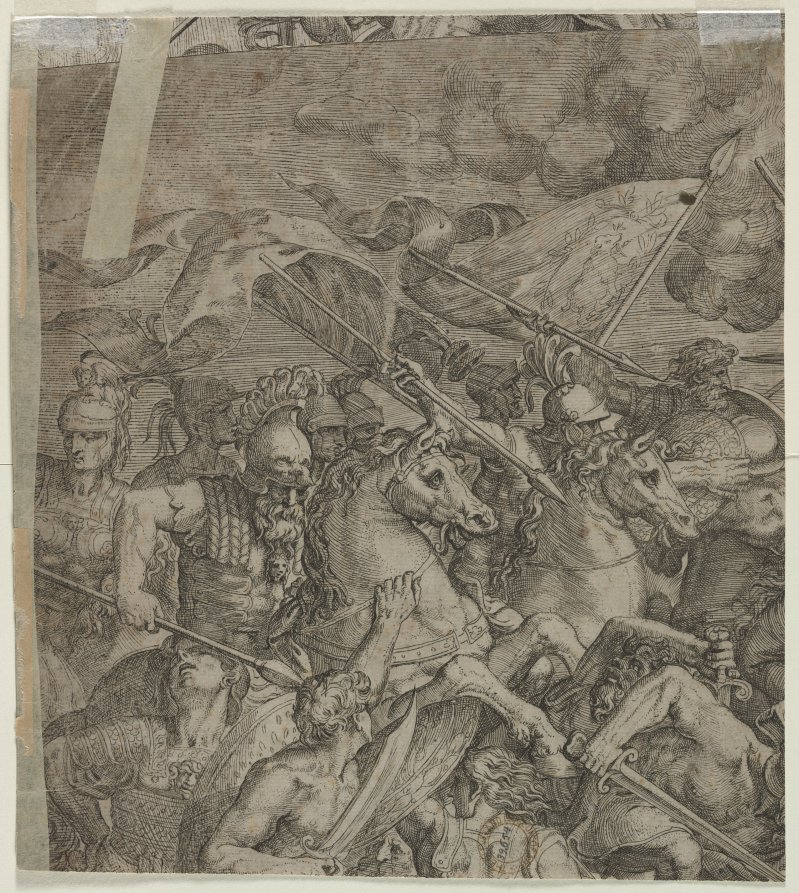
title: Battle of the Milvian Bridge (fragment) (verso)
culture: Italy, 16th century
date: 1500s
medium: etching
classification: Print